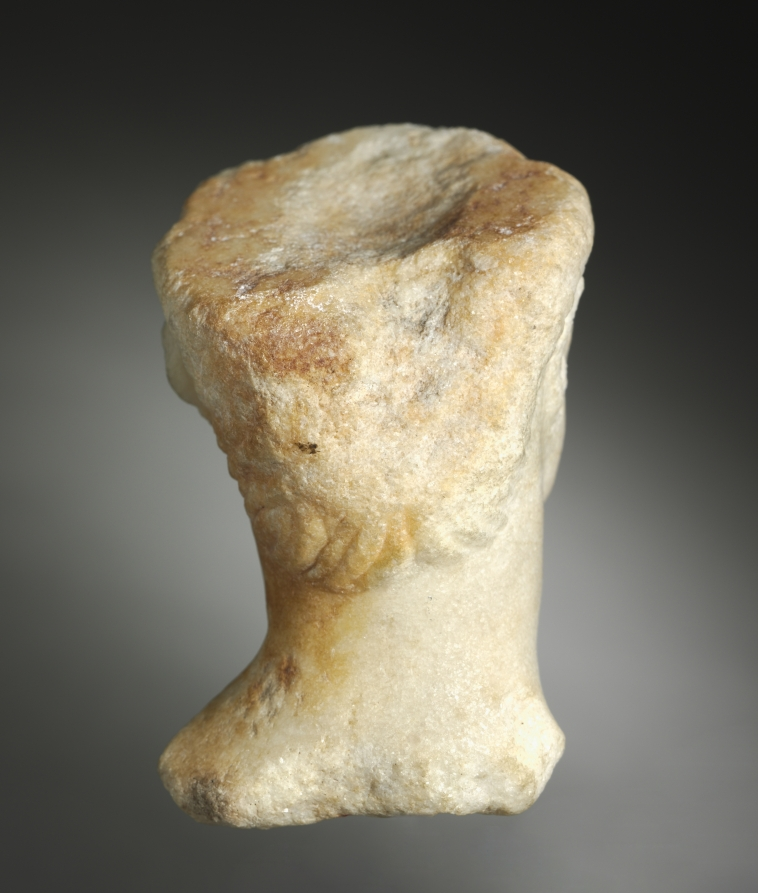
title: Fragment: Head of a Man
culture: Greco-Roman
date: 100 BCE–100 CE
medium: marble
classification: Sculpture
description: This small marble portrait of a man is heavily damaged, with weathering on the face, a break at the neck, and a large portion of the top of the head missing. It depicts a beardless youth with close-cropped hair. The flat top and back of the head may indicate that it was part of a larger composition.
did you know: Some marbles are softer than others and more vulnerable to wear.